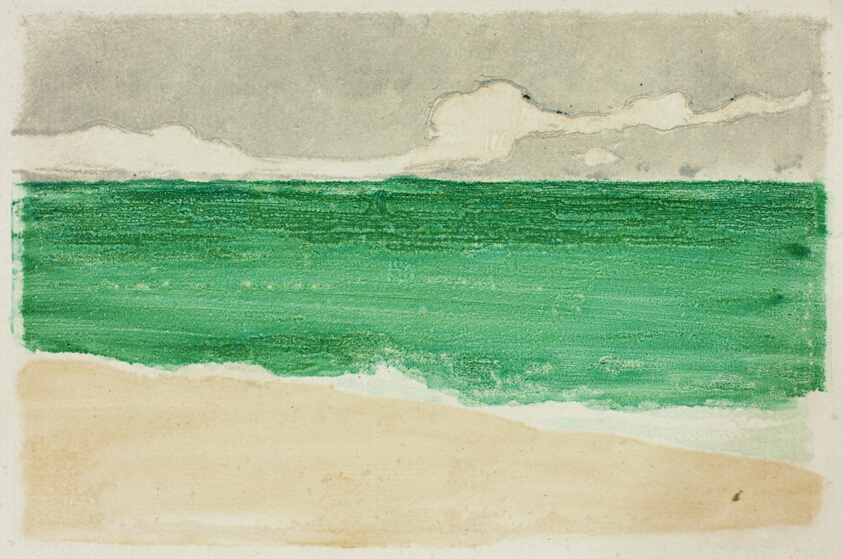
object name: Print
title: The Sea at Bognor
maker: Theodore Roussel (French, worked in England, 1847-1926)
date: 1895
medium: Color monotype, softground, and inkless intaglio on ivory laid paper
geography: France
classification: print; prints and drawing